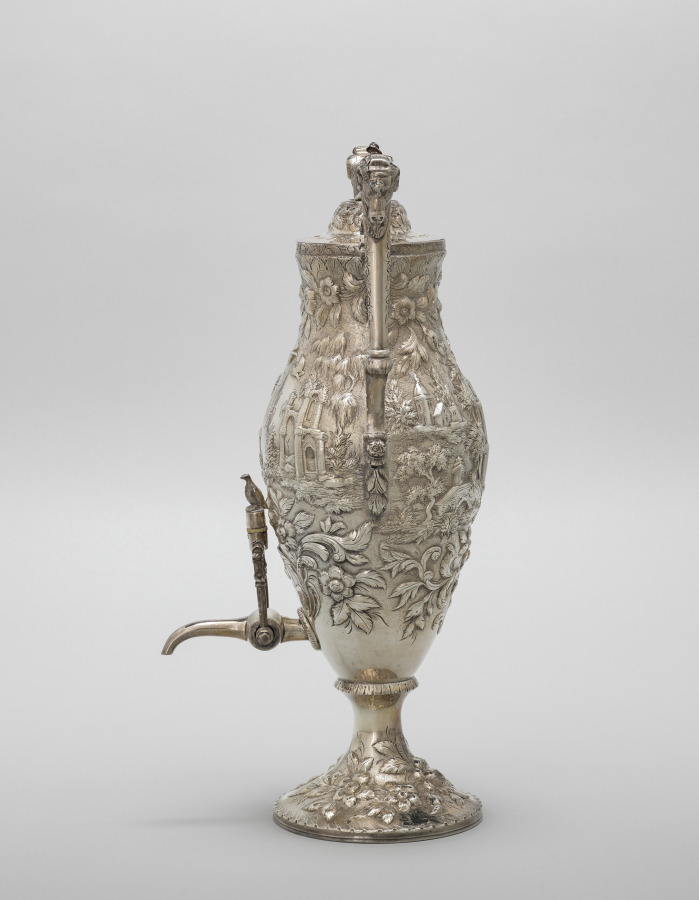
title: Coffee Urn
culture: America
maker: Samuel Kirk (American, 1793–1872)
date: c. 1843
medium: Silver, ivory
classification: Silver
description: Samuel Kirk was a leading American silversmith in the early 19th century whose Baltimore studio had became a major American silver company that thrived throughout the middle of the 20th century. Such a large, impressive coffee urn as this highly decorated example was considered the ultimate in Samuel Kirk silver and was largely made by hand.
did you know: The decoration on this coffee urn was achieved through a technique known as "repousse" in which the design was hammered into relief from behind.